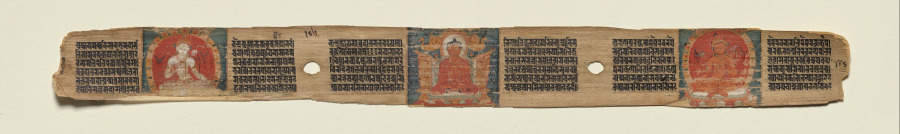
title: Preaching Amitabha with Avalokiteshvara and Manjushri, folio 186 (verso), from a Manuscript of the Perfection of Wisdom in Eight Thousand Lines (Ashtasahasrika Prajnaparamita-sutra)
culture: Eastern India, Bihar, Vikramashila Monastery. Painting: Nepal, Kathmandu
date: Sunday, September 14, 1119 (year 239 of the Newar Samvat in the month of Ashvina)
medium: Gum tempera and ink on palm leaf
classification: Painting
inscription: [gaṅgānadīvā]lukopameṣu trisāhasramahāsāhasreṣu lokadhātuṣu gaṅgānadīvālukopamān buddhān bhagavataḥ paśyati sma bhikṣusaṃghaparivṛtān bodhisattvaguṇapuraskṛtān etaireva nayairebhireva nāmabhiretairevākṣarairimāmeva prajñāpāramitāṃ bhāṣamāṇān / tadyathāpi nāma ahametarhi asminneva trisāhasramahāsāhasre lokadhātau dharmaṃ deśayāmi bhikṣusaṃghaparivṛto bodhisattvagaṇapuraskṛtaḥ, ebhireva nayairebhireva nāmabhirebhirevākṣarairimāmeva prajñāpāramitāṃ bhāṣe / so 'cintyena bāhuśrutyena śrutasāgaratayā ca samanvāgato 'bhūt, sarvāsu ca jātiṣu na jātu buddhavirahito 'bhūt / yatra yatra buddhā bhagavantaḥ saṃmukhībhūtā bhavanti, tatra tatropapadyate sma / avirahitaś ca bhavati sma buddhairbhagavadbhiḥ, antataḥ svapnāntaragato 'pi / sarve ca anena akṣaṇā vivarjitāḥ, kṣaṇasaṃpaccārāgitā // tatra khalu punarbhagavānāyuṣmantamānandamāmantrayate sma - tadanenāpi te ānanda paryāyeṇa evaṃ veditavyam - ityapīyaṃ prajñāpāramitā bodhisattvānāṃ mahāsattvānāṃ sarvajñajñānasyāhāriketi / tasmāttarhi ānanda bodhisattvairmahāsattvaiḥ sarvajñajñānaṃ pratilabdhukāmairasyāṃ prajñāpāramitāyāṃ caritavyam / iyaṃ prajñāpāramitā śrotavyā udgrahītavyā dhārayitavyā vācayitavyā paryavāptavyā pravartayita[vyā]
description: The red Buddha Amitabha is seated under a tree on a throne in the middle of the upper page; two geese—his animal emblems—perch at the top on either side. A white and red bodhisattva are on either side. This manuscript, consisting of 188 double-sided folios, was calligraphed by a scribe at a monastery in northeastern India, commissioned by a monk from Nepal. Judging from the style of the paintings, they are the work of Nepalese artists.